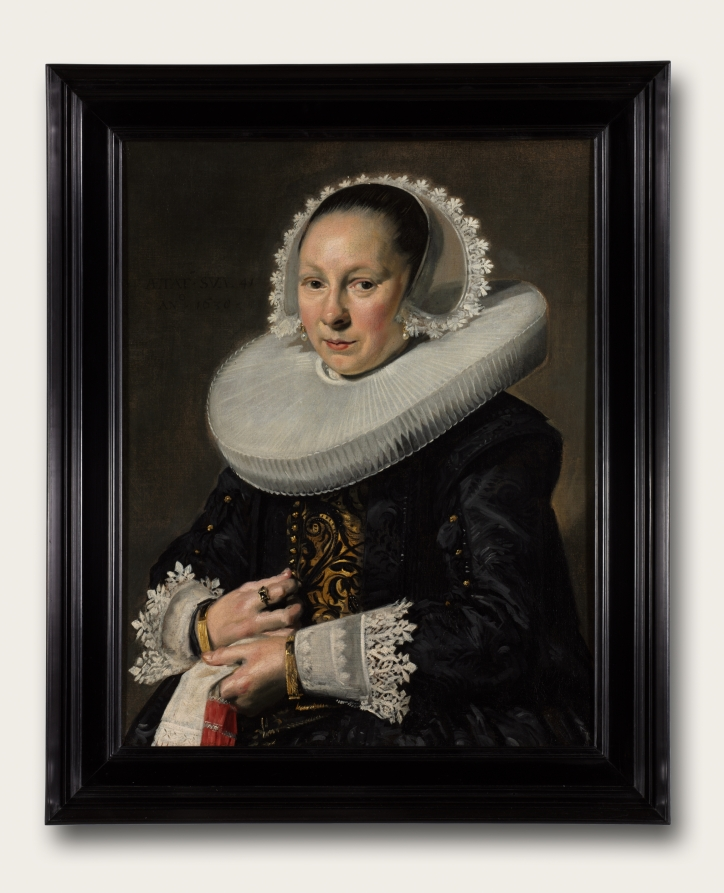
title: Portrait of a Woman, probably Aeltje Dircksdr. Pater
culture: Netherlands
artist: Frans Hals (Dutch, c. 1581–1666)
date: 1638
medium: oil on canvas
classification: Painting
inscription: Inscribed upper left: "AETAT SUAE 41 / ANNO 1638"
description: Portraits by Hals often feature bold, jagged brushstrokes. This portrait shows him experimenting with the “wet-into-wet,” technique, in which layers of paint were added in succession without being allowed to dry in between. Note the blended strokes used at the woman’s hairline to suggest individual strands of hair. The sitter has been tentatively identified as Aeltje Dircksdr. Pater (1597–1678), wife of the Haarlem brewer and burgomaster (mayor) Jan de Wael (1594–1663). An inscription states she was 41 when Hals painted her.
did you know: Jewelry, lace, and sumptuous fabrics show off this woman's wealth—and the artist's skill in painting them.